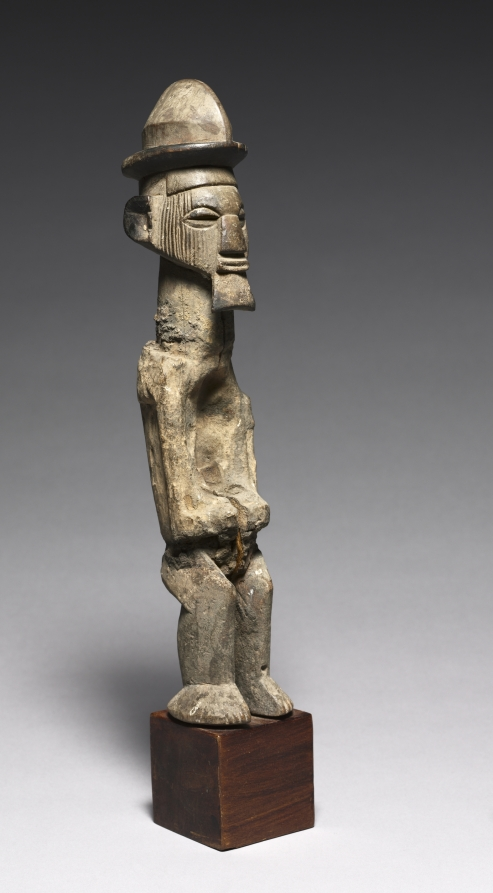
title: Male Figure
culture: Africa, Central Africa, Republic of the Congo or Democratic Republic of the Congo, Teke-style maker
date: early 1800s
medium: Wood and organic materials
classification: Sculpture